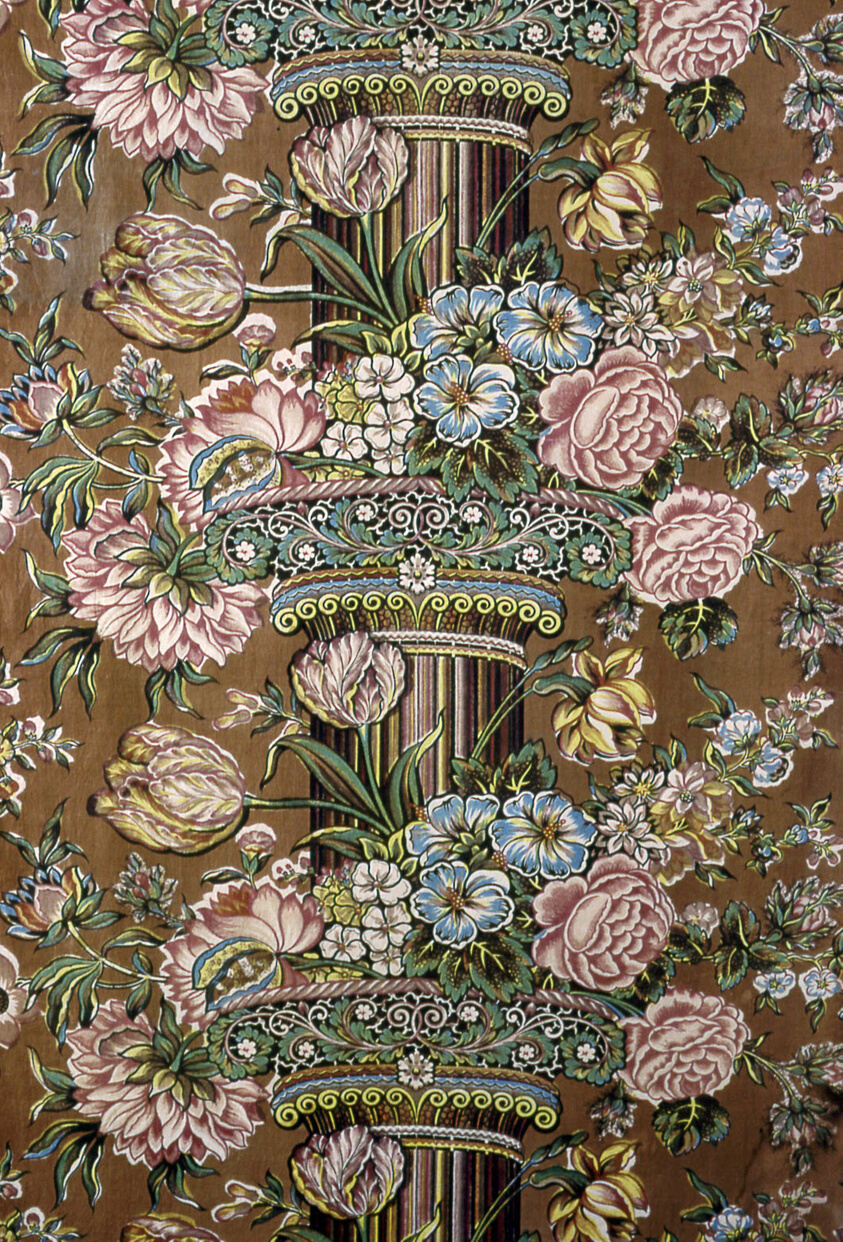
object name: Textile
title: Panel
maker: England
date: 1830/35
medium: Cotton, plain weave; roller printed; glazed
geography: England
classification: textile; weaving - printed; printed textile